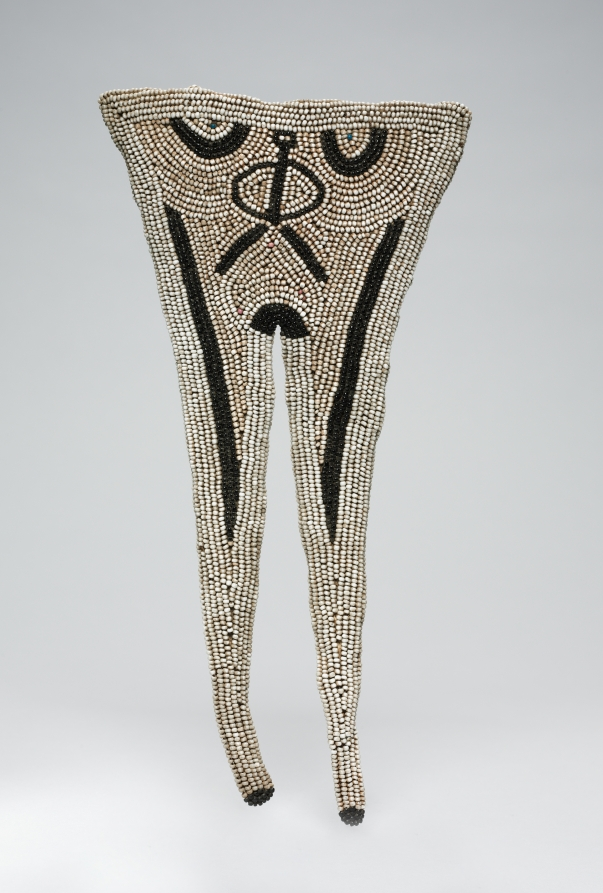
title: Under apron (iinkciya)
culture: Africa, Southern Africa, South Africa, Xhosa-style (South Nguni) maker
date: 1800s–1900s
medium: Leather, glass beads, and sinew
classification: Garment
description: This is an exquisite example of a rare type of swallowtail-shaped apron worn by young female initiates until the mid-19th century. On the upper portion, the black beads were applied in such a way that they can be read as a human face or even as a full figure. In fact, the overall form of the apron can be viewed as representing the lower torso and legs of a woman with a neatly marked pubic region.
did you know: Women made beaded "aprons" like this to wear under their clothes on festive occasions in the nineteenth century; expensive imported beads were a sign of wealth and status.